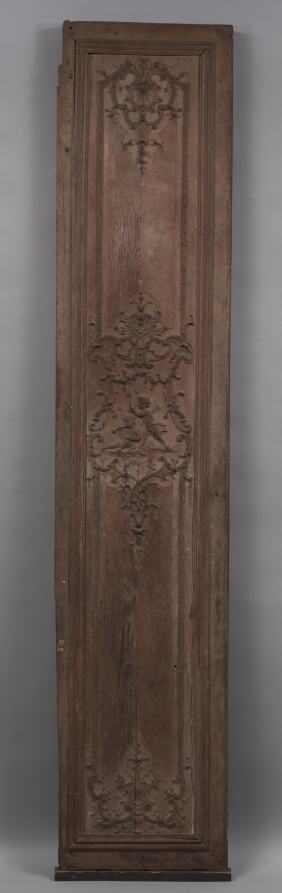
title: Panel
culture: France, Regency Period, 18th Century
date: 1715–1723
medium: wood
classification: Furniture and woodwork